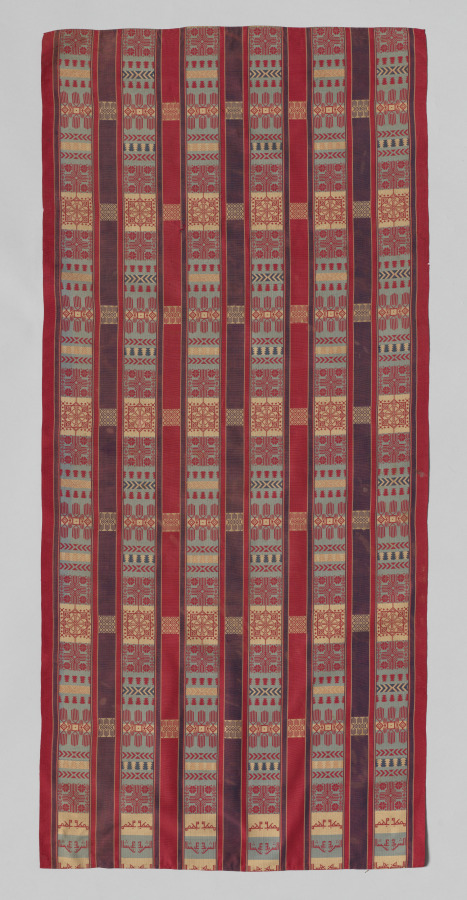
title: Panel from a Head Covering (‘Ajar)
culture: Africa, North Africa, Tunisia, probably Testour or Tunis, Tunisian weaver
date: probably 1800s or early 1900s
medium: Silk, metal, dye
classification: Textile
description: This panel was part of an urban Tunisian woman’s head-covering (‘ajar). Two such panels flanked a face-obscuring black panel. Such luxurious garments of seclusion were once reserved for elites. The decorative panels draped down when worn, showing off the finely woven motifs and demonstrating the wearer’s family wealth. Arranged in bands, motifs include stylized trees (or protective hands), flowers, eight-pointed stars, and geometric designs. The mirrored Kufic (squared Arabic script) lettering in teal is likely the name of the weaver or panel owner. Weavers with Muslim Andalusian (southern Spanish) heritage originally made these, drawing from Andalusian and Turkish motifs; later, workshops in Tunis produced them.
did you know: The khamsah (خمسة), an open five-fingered hand, is a protective motif. It is woven in red in multiple ways on this panel.